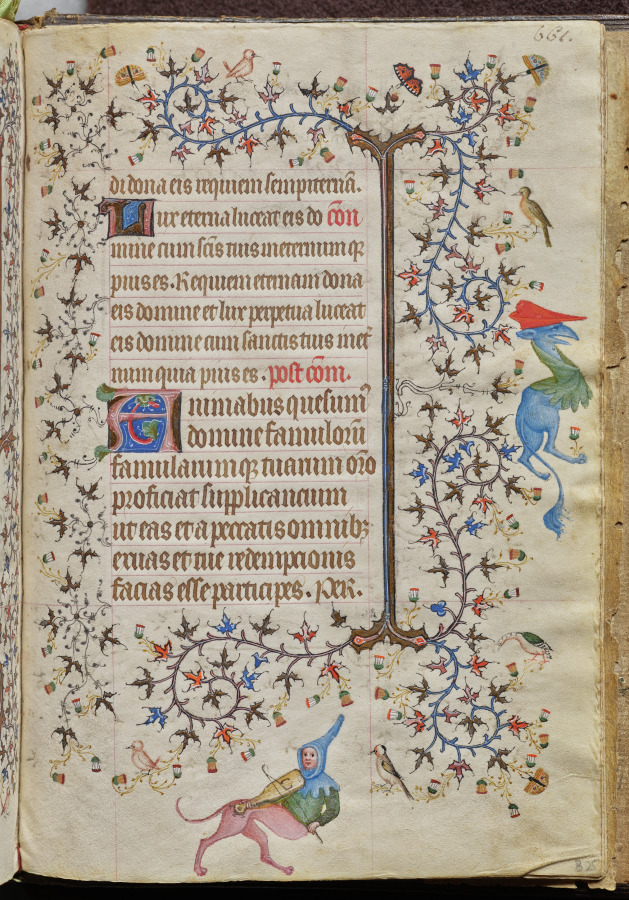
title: Hours of Charles the Noble, King of Navarre (1361-1425), fol. 325r, Text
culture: France, Paris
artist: Master of the Brussels Initials and Associates (French)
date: c. 1405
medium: ink, tempera, and gold on vellum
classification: Bound Volume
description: This precious volume was obviously highly prized by its owner, the French-born King of Navarre, who had his coat of arms painted on no less than twenty folios. Rather than directly commissioning this manuscript from a specific workshop, it seems that Charles the Noble acquired his book of hours -- perhaps ready-made for the luxury market -- while on a trip to Paris in 1404-05. A collaborative effort, six painting styles are evidenced within the pages of this codex, those of two Italians, two Frenchmen, and two Netherlanders. The painter who was responsible for the planning and decoration of the book, and who produced seventeen of the large miniatures, was a Bolognese artist known as the Master of the Brussels Initials. His principal assistant, responsible for most of the borders, was a Florentine who signed his name "Zecho" da Firenze on folio 208 verso.